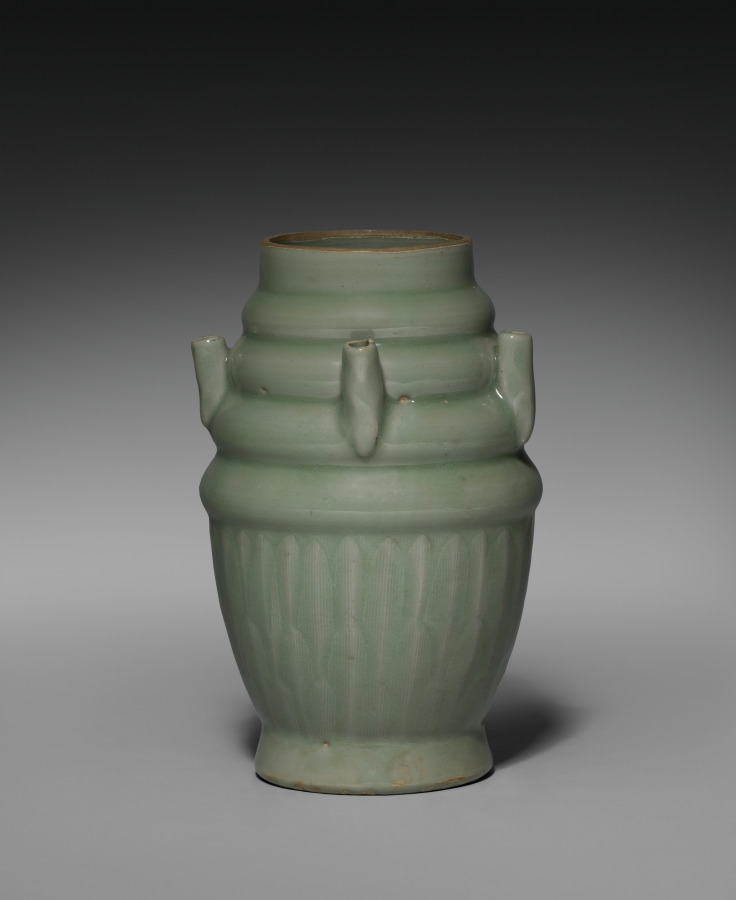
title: Five-Spouted Vase with Cover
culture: China, Zhejiang province, Longquan region, Northern Song dynasty (960-1127)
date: 1000s-1100s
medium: green-glazed porcelaneous stoneware, Longquan ware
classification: Ceramic